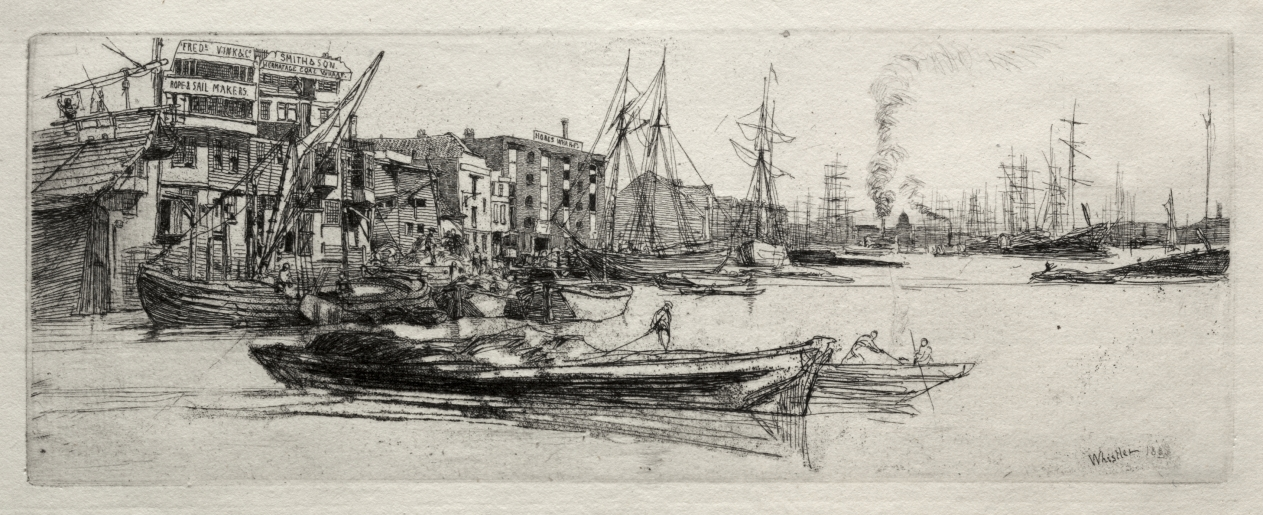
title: Thames Warehouse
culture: America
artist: James McNeill Whistler (American, 1834–1903)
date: 1871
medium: etching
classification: Print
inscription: signed on plate: Whistler 1853